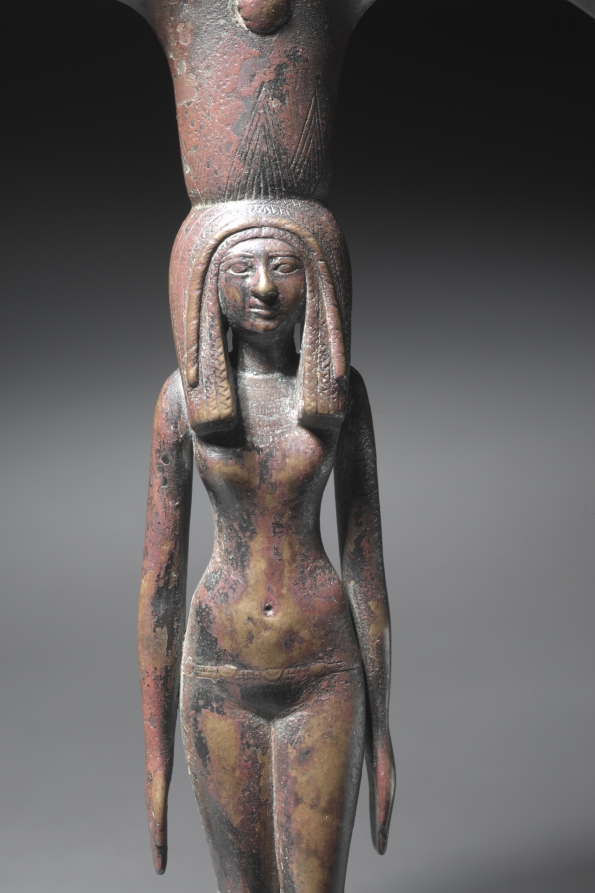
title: Caryatid Mirror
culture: Egypt, New Kingdom (1540–1069 BCE), Dynasty 18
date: c. 1540–1296 BCE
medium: bronze with black copper inlay?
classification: Cosmetic Objects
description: This superb mirror has an oval disk and a handle in the form of a nubile young girl, entirely naked except for her elaborately braided tripartite wig, broad collar, and a girdle of wallet beads. She stands on a cruciform base, with her left foot slightly advanced and her hands at her sides. On her head and supporting the disk is a papyrus umbel with flaring tips. Mirrors with handles in the form of naked young girls were the height of fashion in mid-Dynasty 18; numerous examples exist. This mirror is perhaps the finest of its kind. The cruciform base is unusual, if not unique. The iconography is understandable in relation to the goddess Hathor, the embodiment of love and beauty. A multifaceted goddess, she was equated with Aphrodite by the Greeks. The retinue of Hathor consisted precisely of such beauties, called nefrut in Egyptian, and the mirror itself, that reflection of beauty, appears to have had Hathorian connections from early times.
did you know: When they were made, this mirror was polished to a brilliant shine; the marvelous colored patina it has since acquired is the result of being buried for years in the ground.